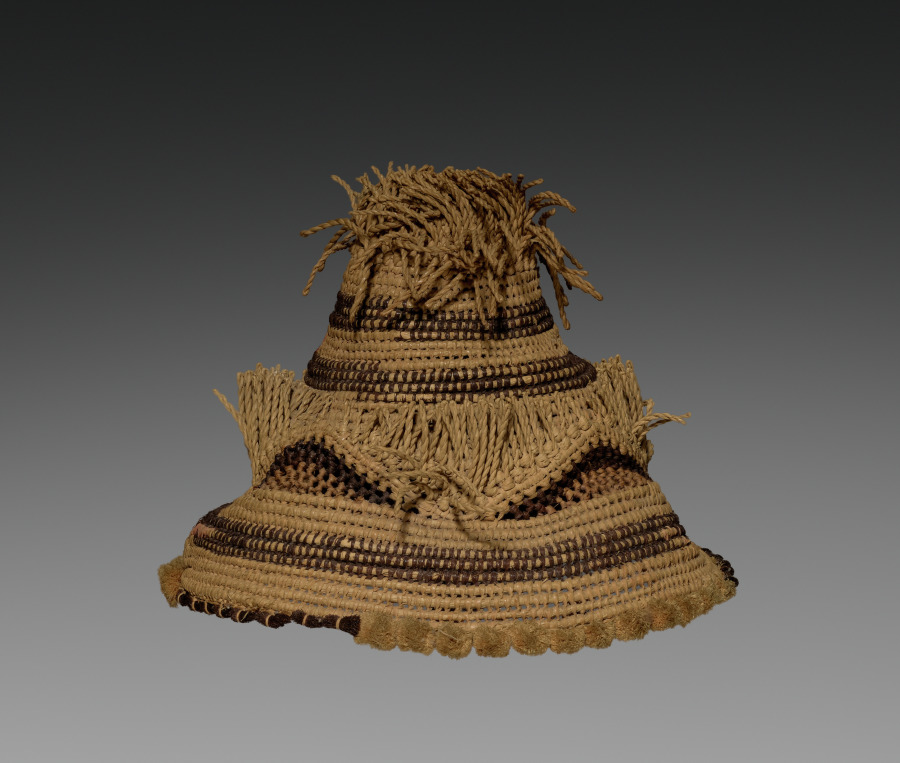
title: Hat with Pin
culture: Africa, Central Africa, Democratic Republic of the Congo, Kuba-style maker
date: early 1900s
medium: Raffia and dye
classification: Garment